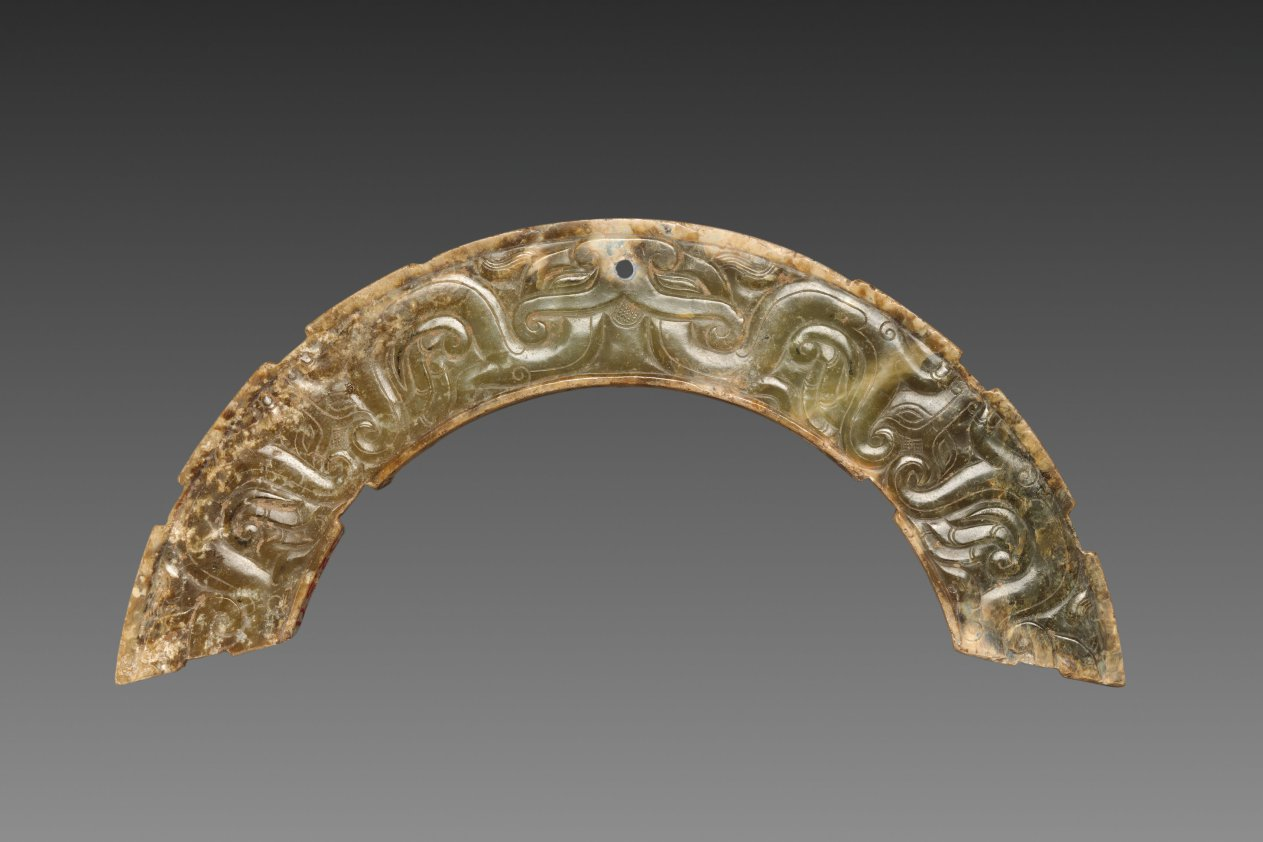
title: Arc-shaped Pendant with Animal Mask and Interlaced Animal Bands (Huang)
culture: China, Warring States period (475–221 BCE) to Western Han dynasty (206 BCE–8 CE)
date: 300–100 BCE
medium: jade (nephrite)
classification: Jade